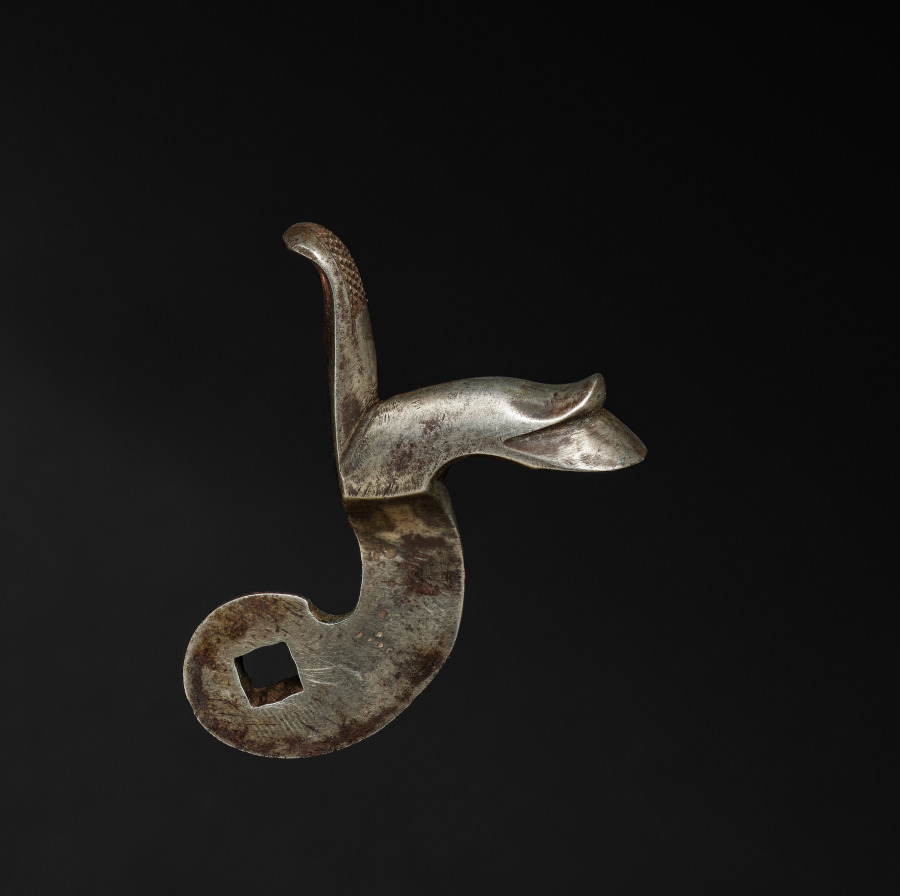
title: Gun-Lock Hammer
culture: England, early 19th century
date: c. 1800–1825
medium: steel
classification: Arms and Armor